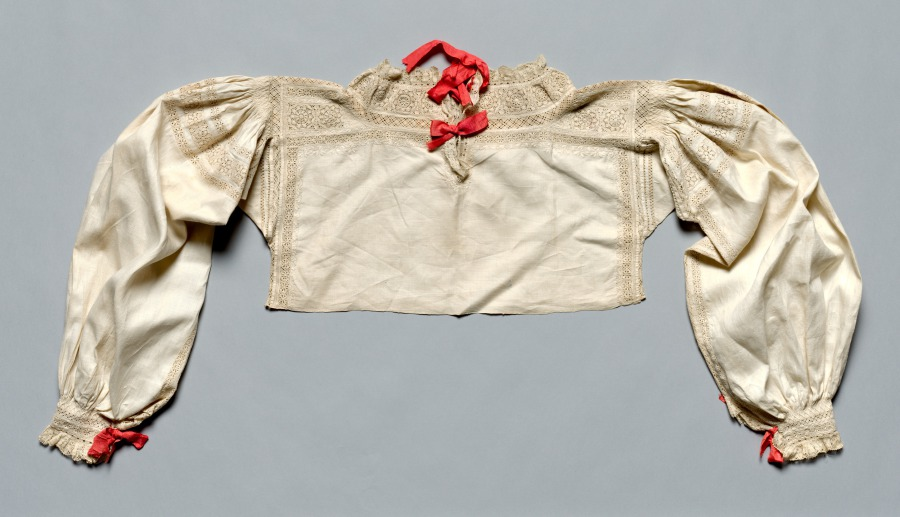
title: Linen Blouse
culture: Hungary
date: early 1900s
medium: linen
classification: Garment